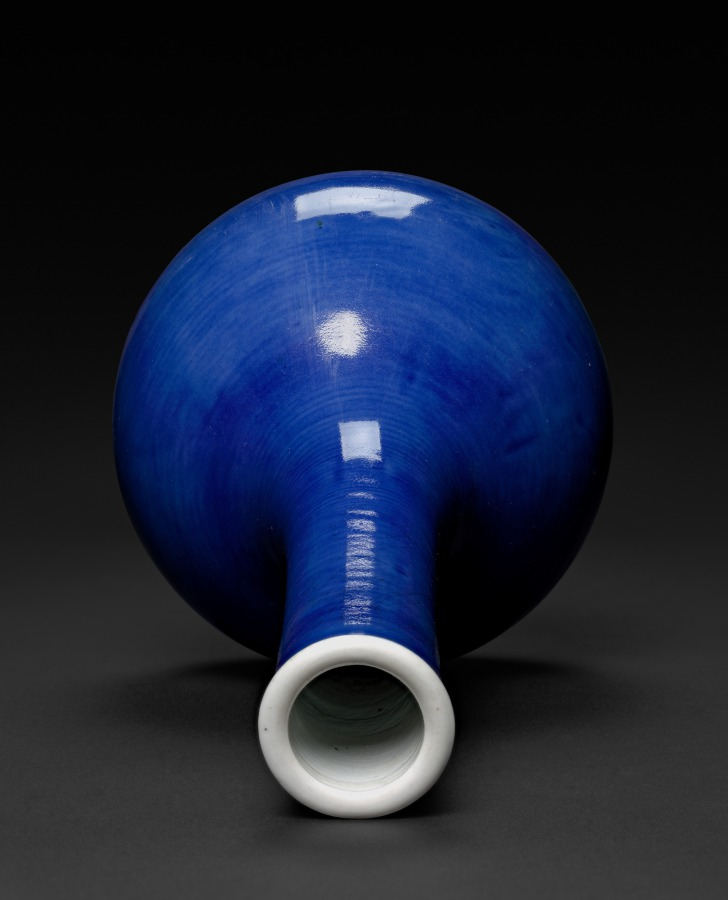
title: Bottle Vase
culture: China, Qing dynasty (1644-1911), Kangxi reign (1662-1722)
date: 1662–1722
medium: porcelain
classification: Ceramic